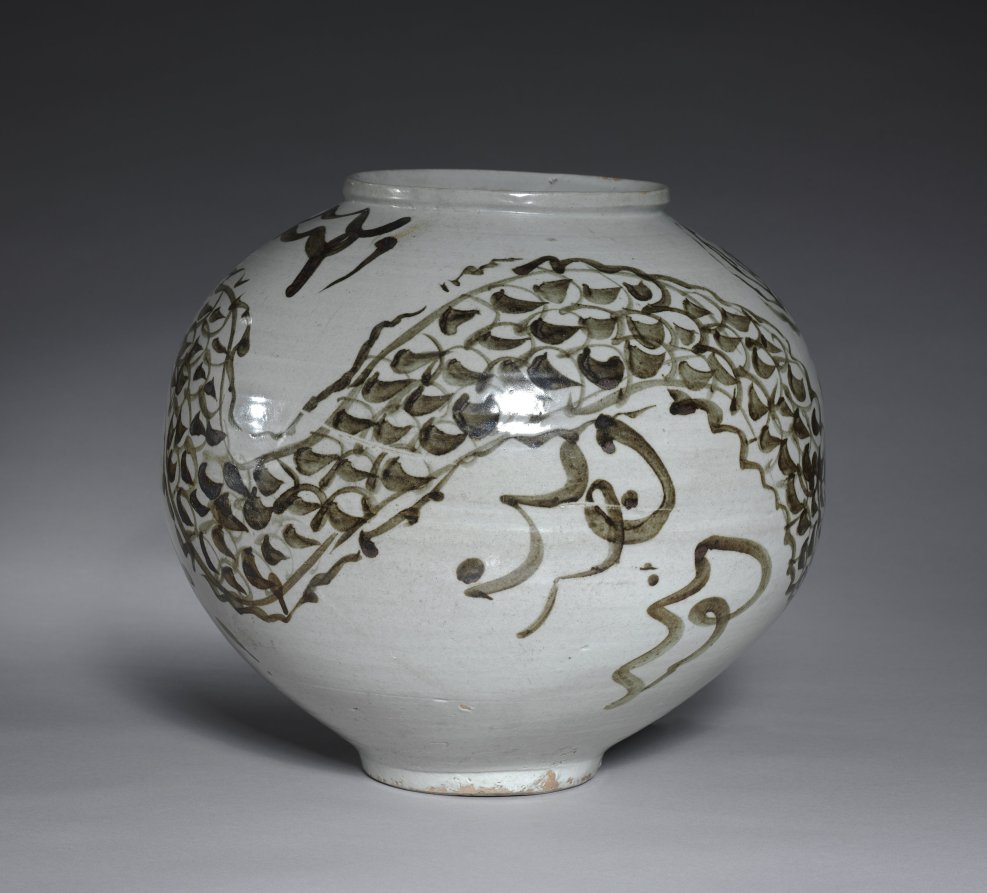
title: Jar with Dragon and Clouds Design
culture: Korea, Joseon dynasty (1392–1910)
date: late 1600s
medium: porcelain with underglaze iron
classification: Ceramic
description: In traditional Korean art, dragons were used as an emblem of royalty. Over centuries, the ways of depicting this powerful mythical creature varied in response to artistic trends and socioeconomic changes. Here, the artist imagined with free-flowing calligraphic brushstrokes a whimsical dragon with bulging eyes who wraps his scaled body around the vessel. This piece was acquired from the London Gallery in Tokyo, Japan. Its owner, Tajima Mitsuru (born about 1936) is regarded as one of the pioneering Japanese art dealers to cultivate lasting relationships directly with collectors and museums in the United States.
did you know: A mythical creature believed to have the power to make rain, the dragon is a prominent symbol of rulers in premodern East Asia; the image of dragons was used exclusively for the king's paraphernalia.